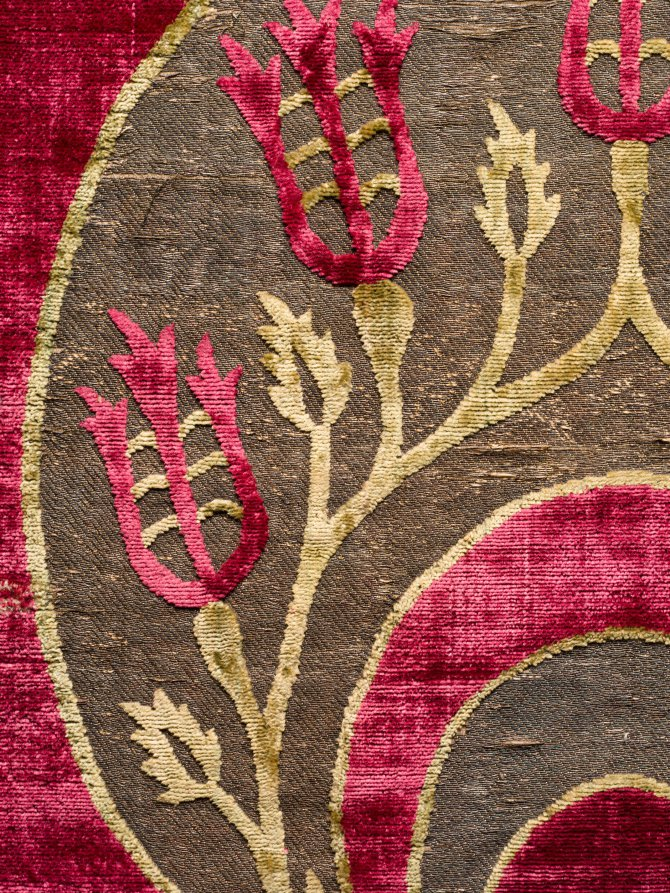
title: Brocaded velvet cushion cover with crescents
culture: Turkey, Istanbul or Bursa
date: 1525–75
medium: velvet, brocaded: silk, gilt- and silver-metal thread, and cotton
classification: Velvet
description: This cushion cover is one of the earliest and highest quality examples that has survived. The vibrant pattern displays large crescents inscribed with smaller crescents and elegant rosebuds on a leafy vine. The six-pointed lappet designs across each end identify its function as a cover for a cushion on a divan, the equivalent of a Western sofa. The elegant yet lively quality of the drawing, velvet weave, and dense metal thread indicate that it was made near the height of Ottoman silk textile production in the mid-1500s.